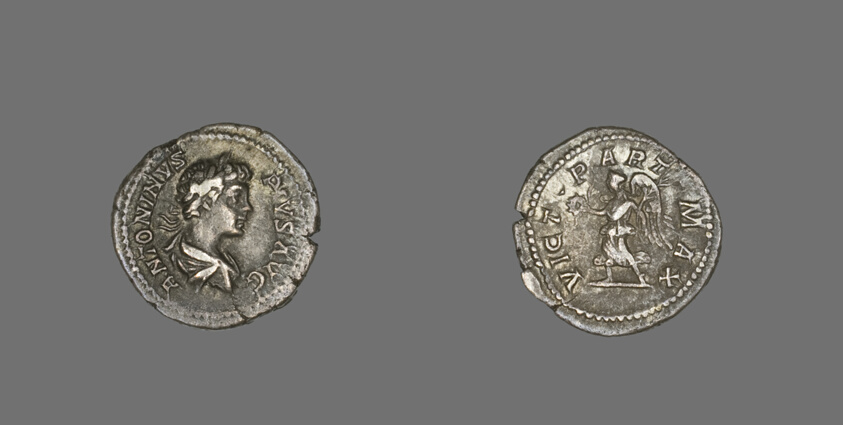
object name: Coin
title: Denarius (Coin) Portraying Emperor Caracalla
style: roman (ancient, style or period), ancient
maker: Roman, minted in Rome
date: 201-206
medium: Silver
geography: Roman Empire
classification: coin; ancient art; struck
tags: goddesses